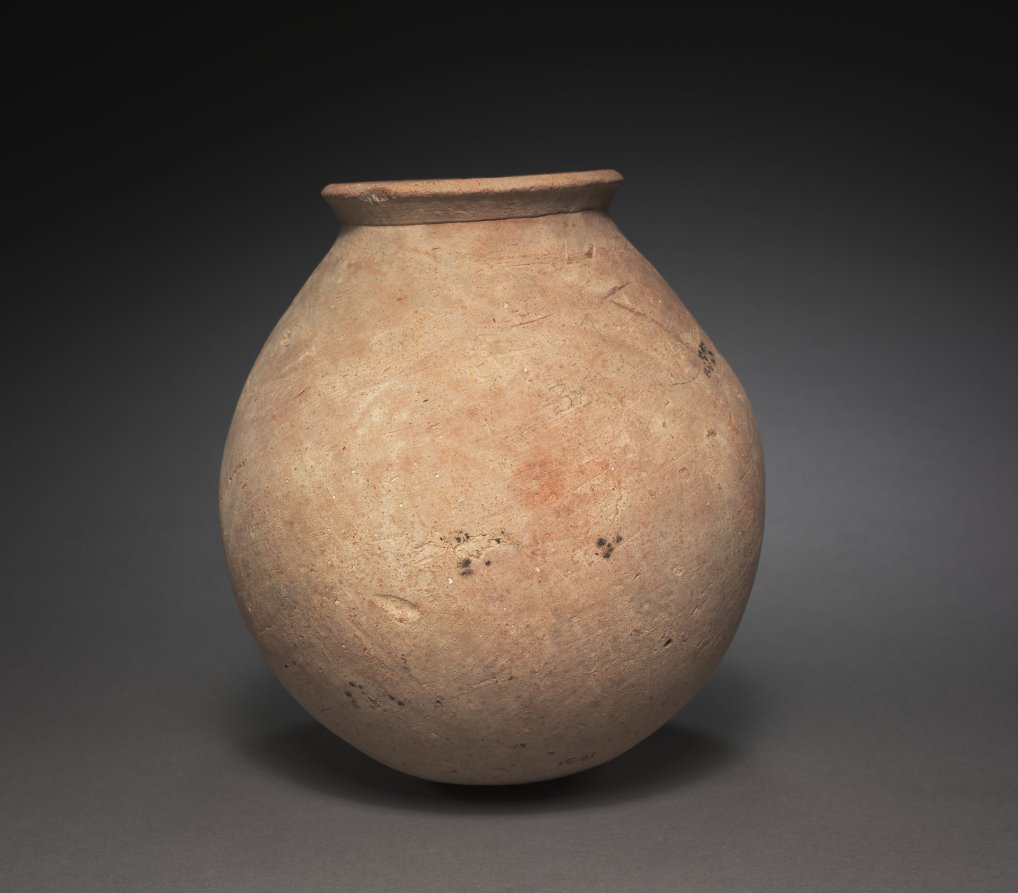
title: Water Jar (Globular Jar)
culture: Egypt, Haraga, cemetery S, tomb 366, excavated in 1914, Middle Kingdom (2040–1648 BCE), Dynasty 12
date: 1980–1801 BCE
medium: marl clay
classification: Vessels